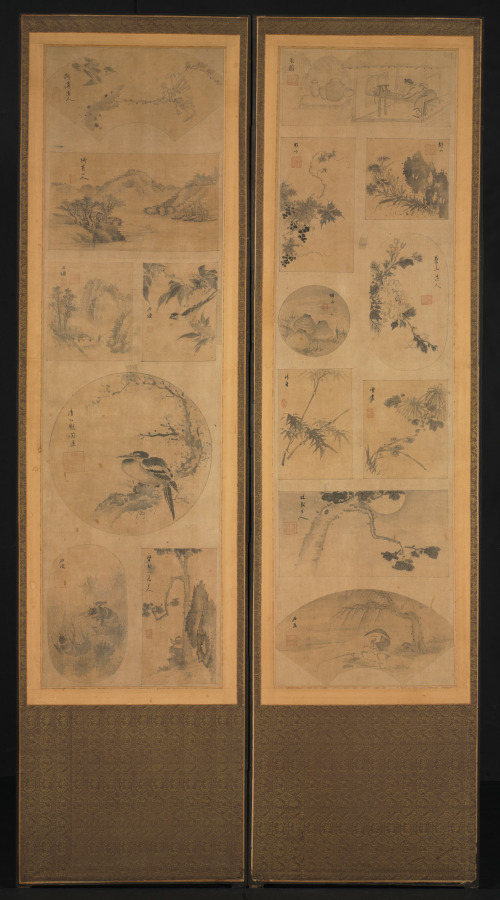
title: Painting of One Hundred Themes (obverse)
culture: Korea, Joseon dynasty (1392–1910)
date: late 1800s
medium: Ten-panel folding screen affixed with album leaves (obverse), calligraphy (reverse), ink and color on silk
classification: Painting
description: This screen depicts paintings on one side and poems on the other—an economical format often used in Korea to allow the viewer to enjoy both sides of one screen. The front features an assortment of bird-and-flower, landscape, and figural paintings executed according to the brush manner of more than 50 artists. A calligrapher has brushed several Chinese poems about the four seasons on the reverse side, among them "Composing in the Daytime of Summer" by Tang poet Liu Zongyuan (773–819) and "Composing when Spring Begins" by Song scholar Zhang Shi (1133–1180).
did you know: Depicting small images of various subjects became one of the most popular types of painting toward the end of the 19th century.